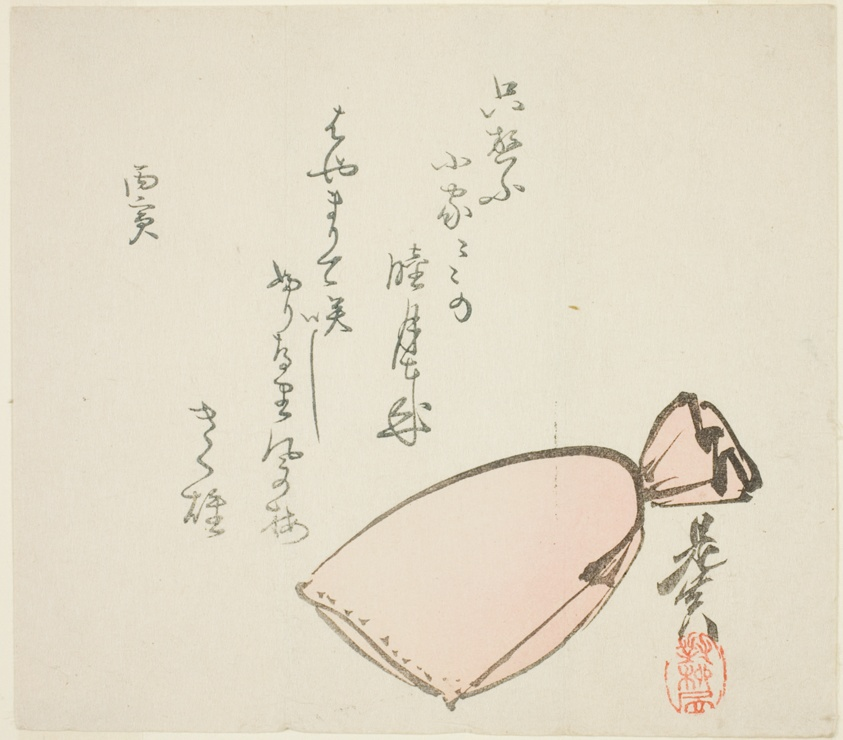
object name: Print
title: A bag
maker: Shibata Zeshin (Japanese, 1807-1891)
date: 1866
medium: Color woodblock print; surimono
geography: Japan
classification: print; asian art